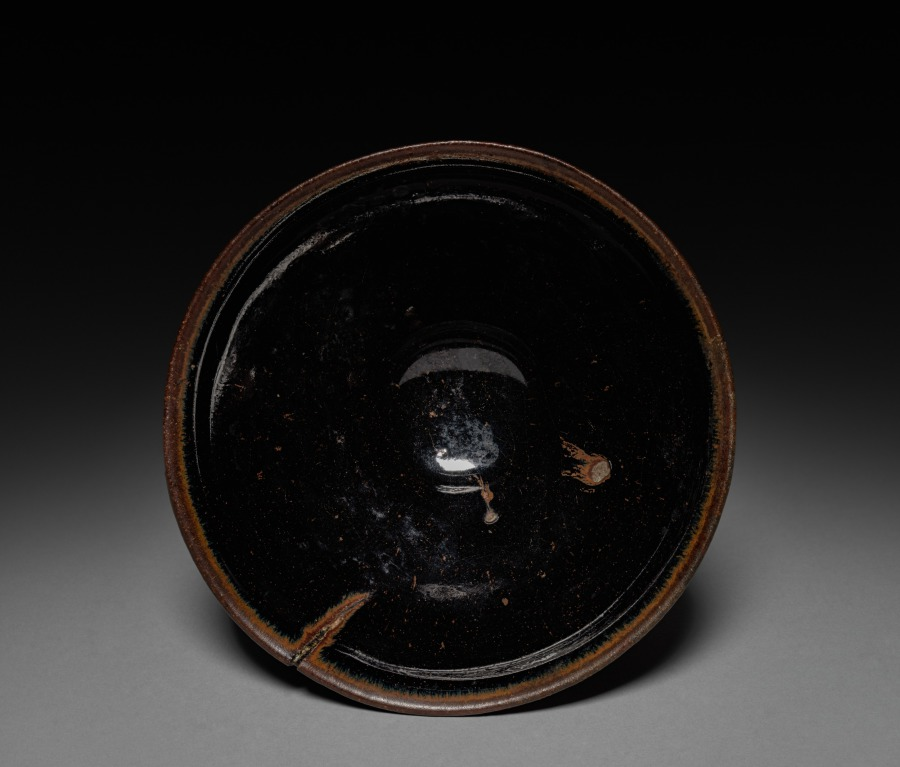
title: Tea Bowl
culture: China, near Shui ch'i, Song dynasty (960-1279)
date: 960–1279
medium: Stoneware, Jian ware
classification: Ceramic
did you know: Jian ware was very popular with the tea cultures in China and Japan.